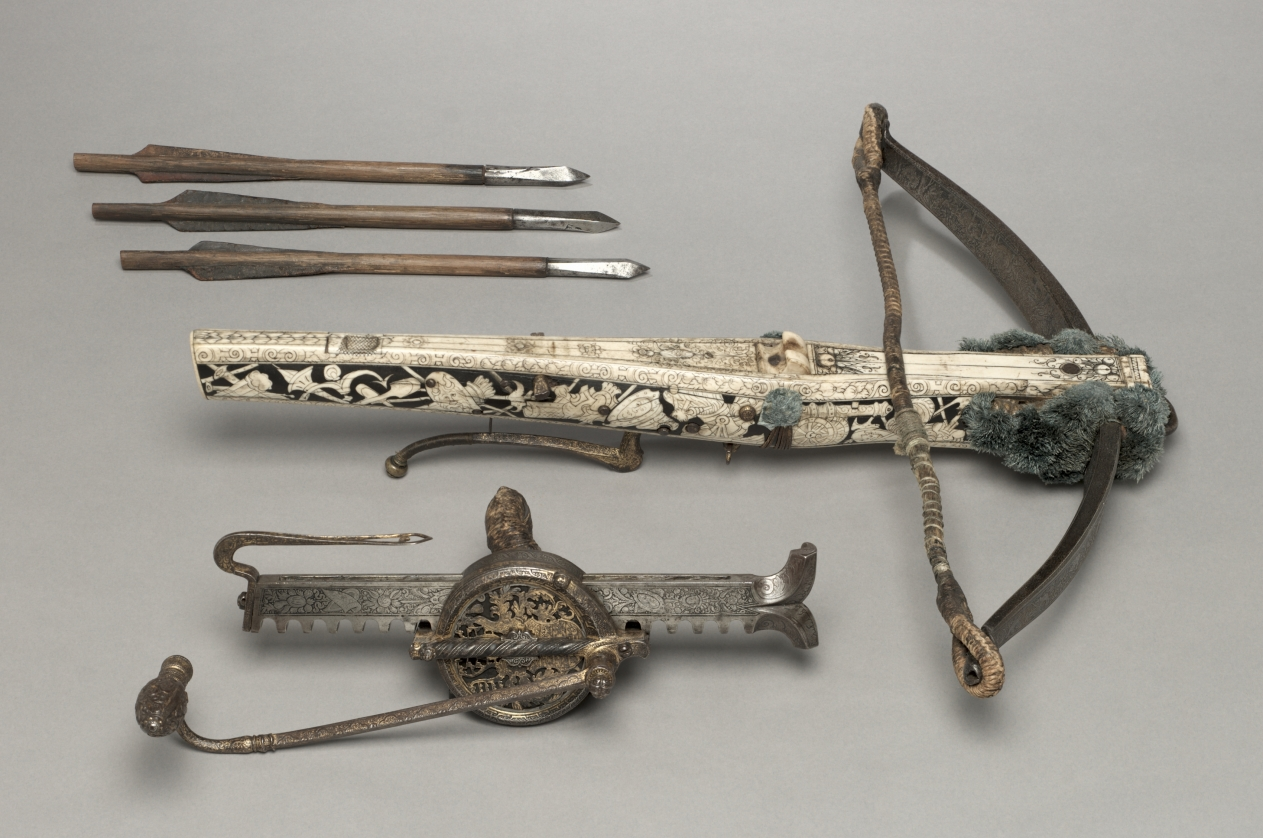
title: Crossbow Bolt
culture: Germany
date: 1500s–1600s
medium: wood, leather, steel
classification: Arms and Armor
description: Also known as a quarrel, crossbow bolts are stockier than arrows, are constructed of durable materials, and can be reused on the field of battle.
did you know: Bolts with leather feathering were used mainly in the Tyrolean area, which includes northern Italy and western Austria.